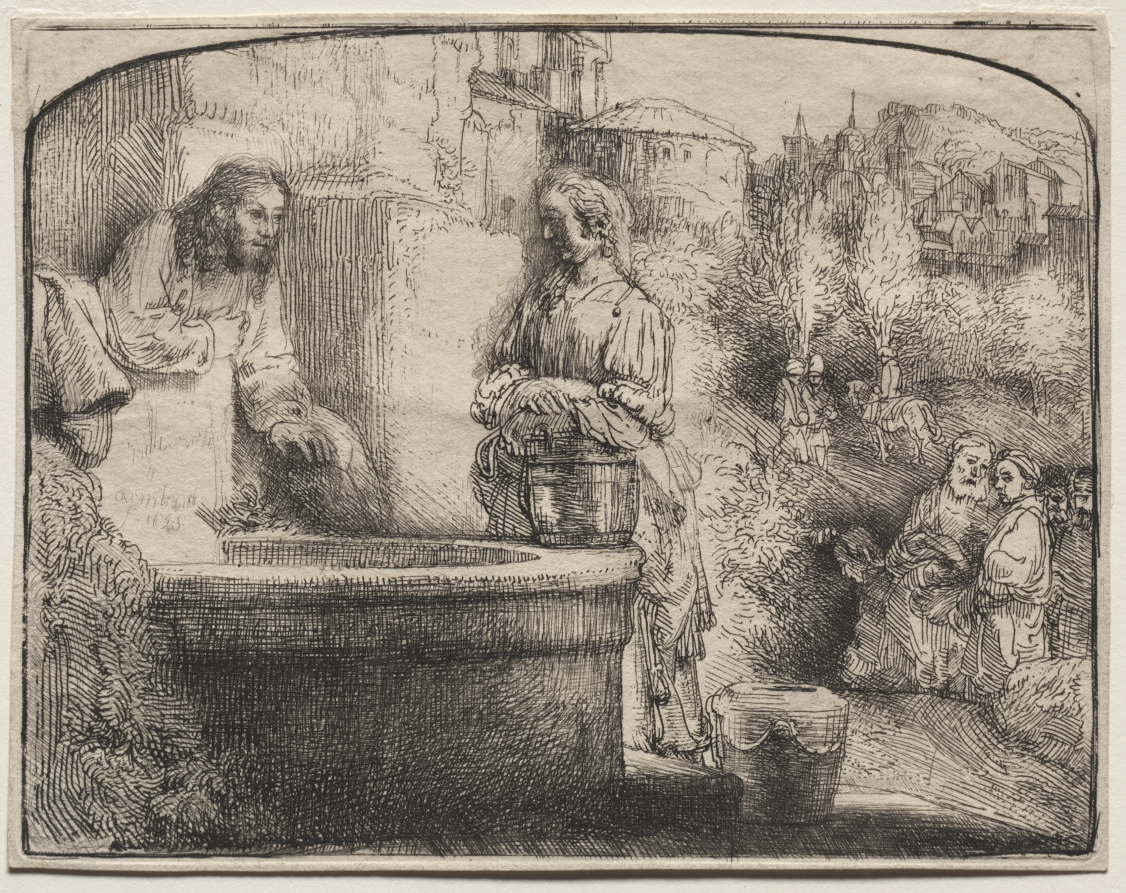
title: Christ and the Woman of Samaria: An Arched Print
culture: Netherlands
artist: Rembrandt van Rijn (Dutch, 1606–1669)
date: 1657–58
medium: etching and drypoint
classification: Print